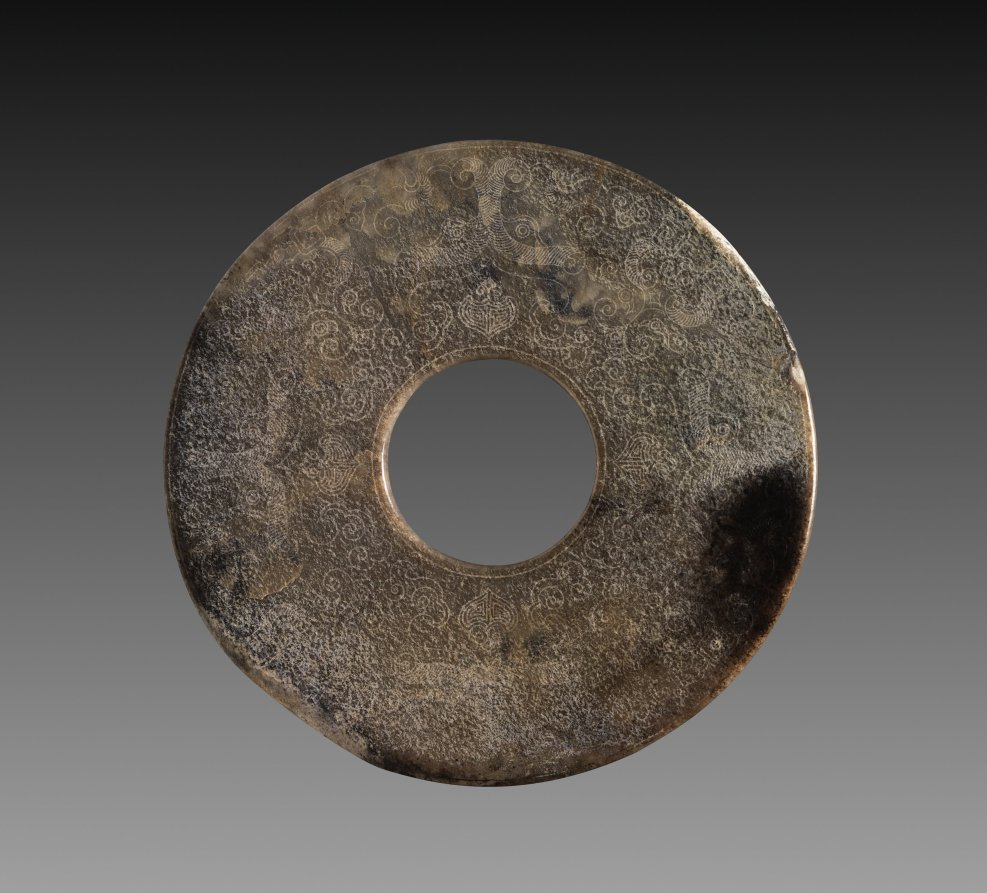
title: Disc (bi) with Imperial Poem in Seal Script (zhuanshu) by the Qianlong Emperor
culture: China, Qing dynasty (1644–1911), Qianlong reign (1736–95)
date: 1736–95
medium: White jade with brown mottling, historic jade, recut and incised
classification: Jade